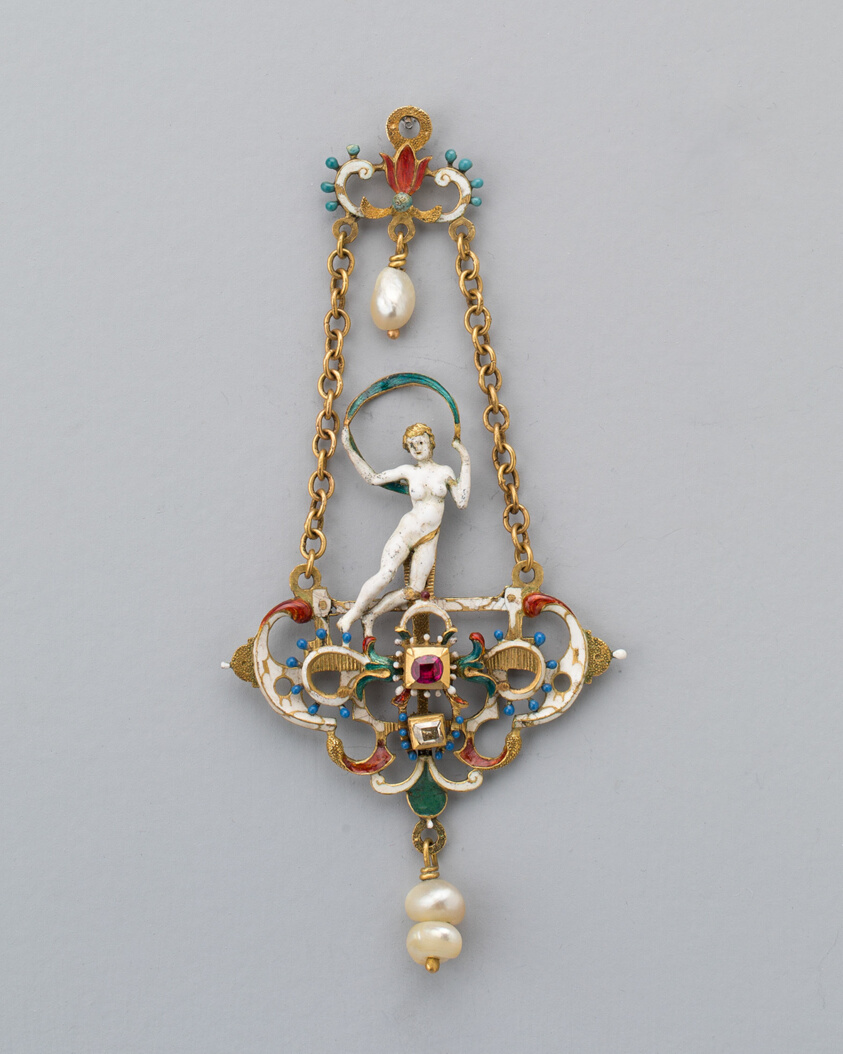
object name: Costume and Accessories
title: Pendant with Figure of Fortune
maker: Northern European, possibly Austrian (Vienna)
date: late 19th century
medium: Gold, enamel, diamond, ruby, and pearl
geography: Vienna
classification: pendant (jewelry); jewelry; european decorative arts; costume